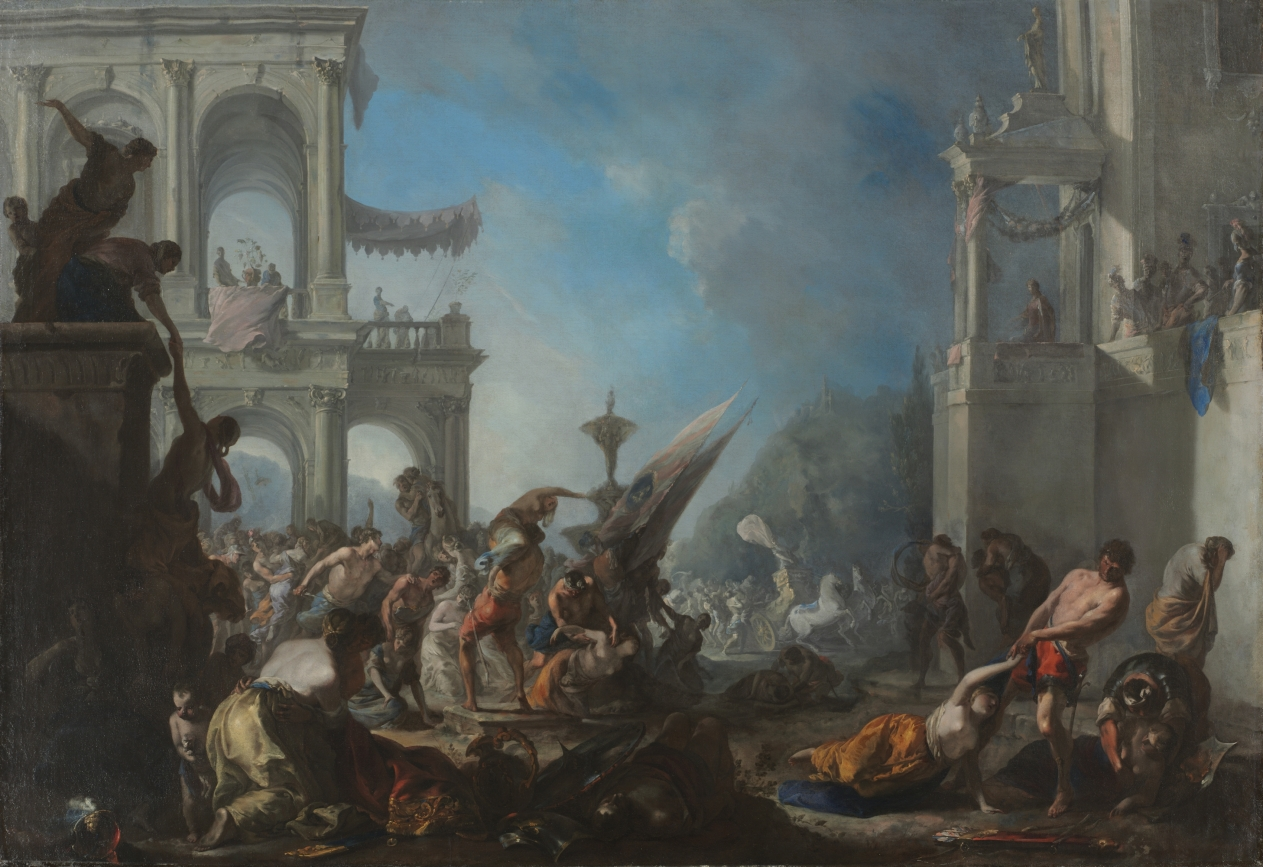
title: Abduction of the Sabine Women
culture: Germany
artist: Johann Heinrich Schönfeld (German, 1609–1684)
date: c. 1640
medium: oil on canvas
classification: Painting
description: Shortly after Rome was founded, the Romans abducted the women of the neighboring Sabines to be their wives. During the ensuing war, the Sabine women intervened, making peace between the two sides. Painted in Naples, this canvas seems to be the last of four versions of the subject painted by Johann Schönfeld (two in the Hermitage, St. Petersburg, another in a private collection).